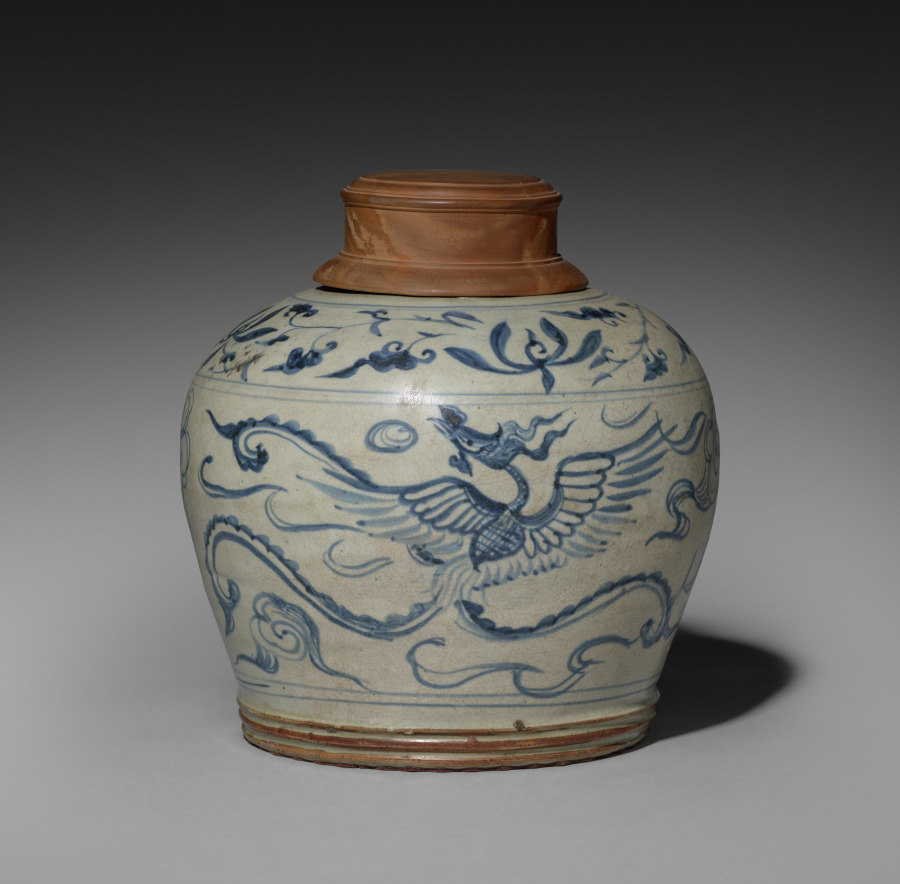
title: Covered Jar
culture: Vietnam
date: 1500s–1600s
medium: stoneware with blue and white decoration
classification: Ceramic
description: This stoneware ginger jar is decorated with a blue and white phoenix among clouds (a symbol of longevity) and floral motifs.